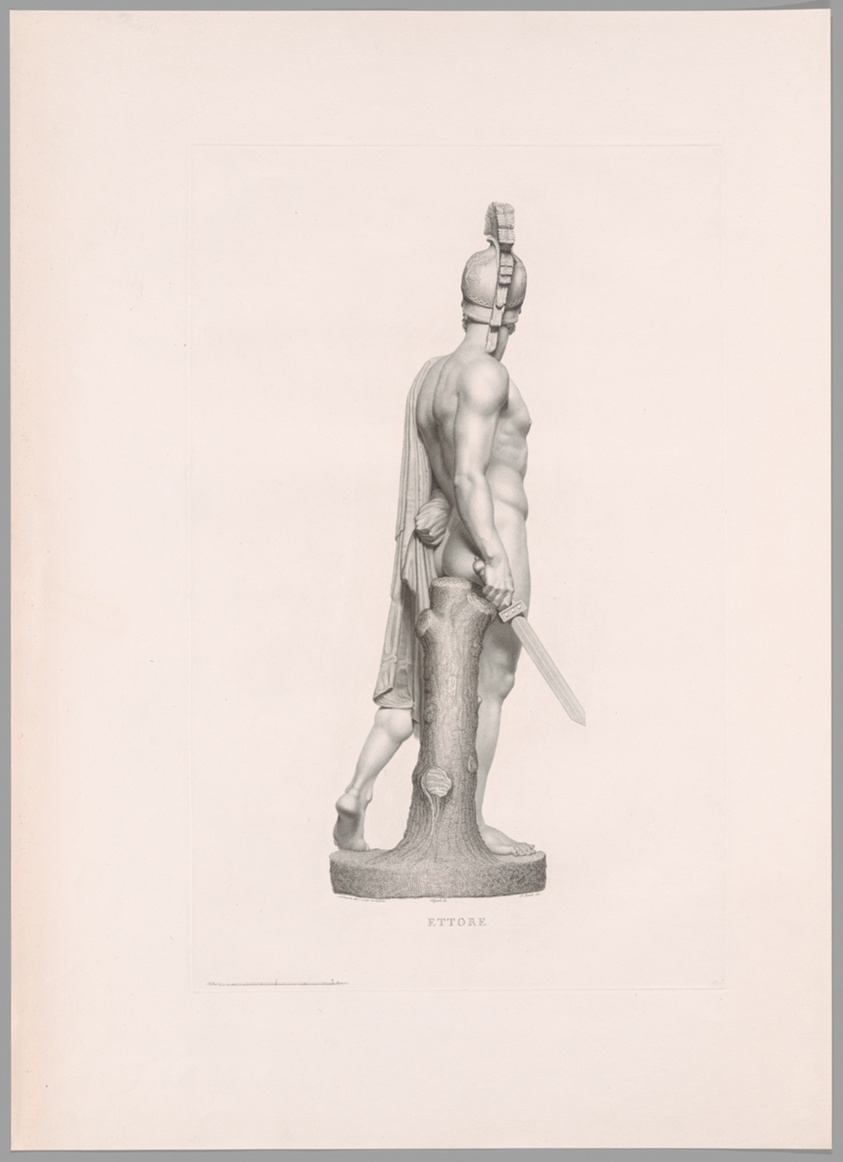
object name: Print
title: Ettore, Side View, from Oeuvre de Canova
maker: Pietro Bonato (Italian, 1765-1820); after a drawing by Giovanni Tognolli (Italian, 1786-1862); after the sculpture of Antonio Canova (Italian, 1757-1822)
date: 1817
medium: Engraving and etching in black on ivory wove paper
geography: Italy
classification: prints and drawing; print; paper; engraving; etching